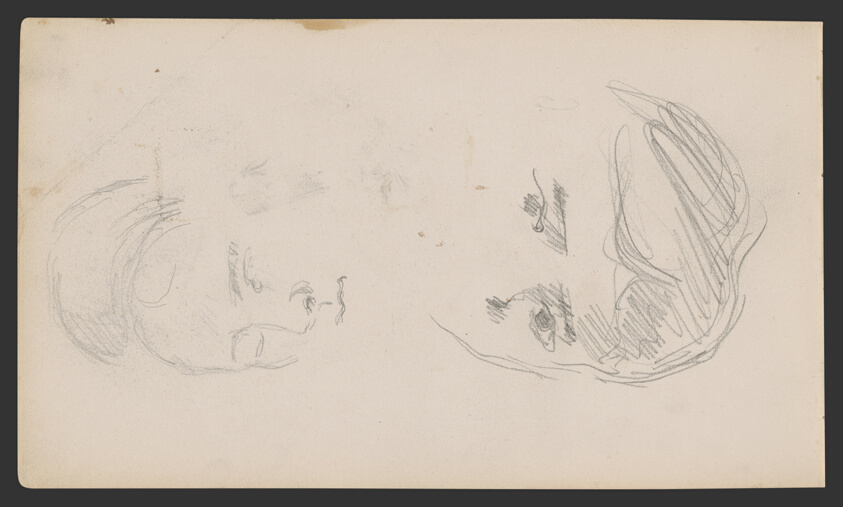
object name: Drawing and Watercolor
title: Sketchbook No. 2 (L'Estaque)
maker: Paul Cézanne; French, 1839-1906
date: 1875–86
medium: Graphite and pen and ink drawings on paper, bound into a book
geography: France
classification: sketchbook; graphite; prints and drawing; paper